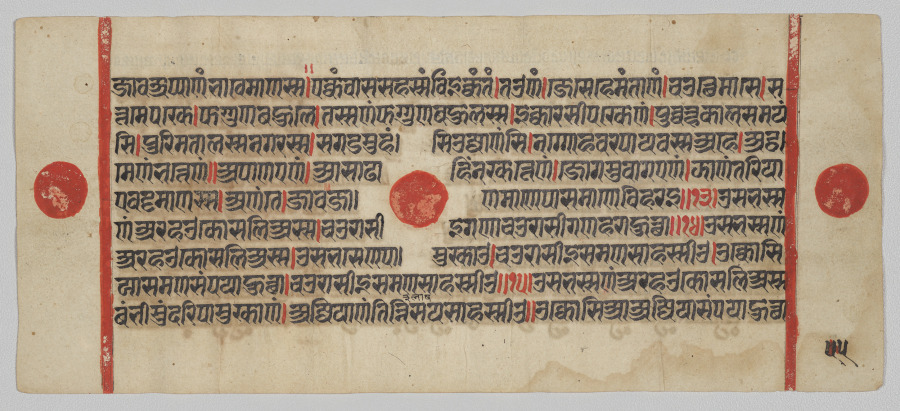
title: Text, Folio 55 (verso), from a Kalpa-sutra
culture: Western India, Gujarat, last quarter of the 15th century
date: c. 1475–1500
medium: Gum tempera, ink, and gold on paper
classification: Painting